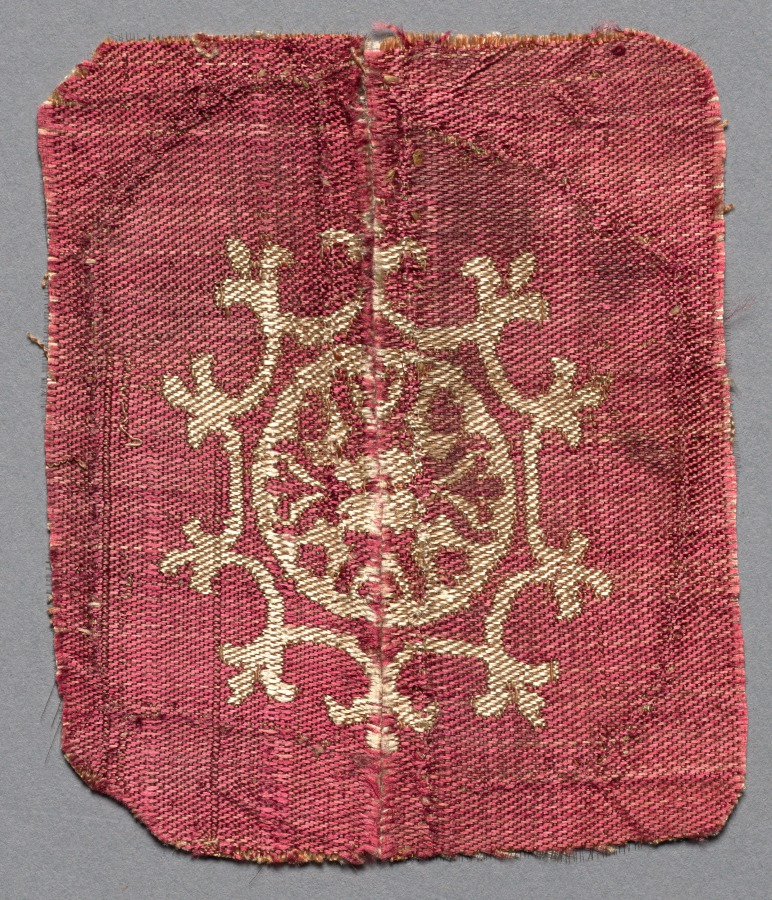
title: Ornament from a Tunic, Two Fragments Joined as One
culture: Syria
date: 8th century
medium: compound twill, silk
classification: Textile